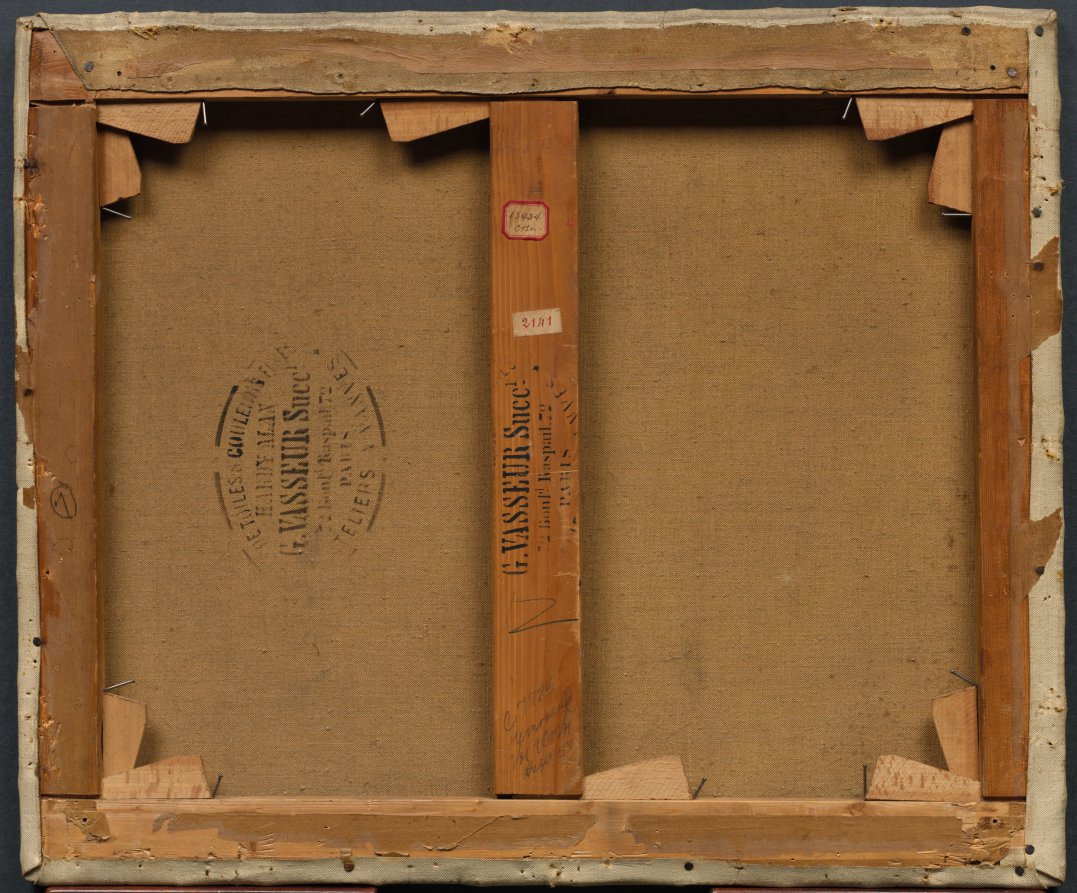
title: Canal in Autumn (Gisors)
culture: France, early 20th century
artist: Henri Le Sidaner (French, 1862–1939)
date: 1913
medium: oil on canvas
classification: Painting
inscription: Distinguishing marks on canvas face: signed with green painting in the lower left: "Le Sidaner"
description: This painting depicts a canal in Gisors, a commune in Normandy, about 40 miles northwest of Paris on the river Epte. Le Sidaner painted this work in a Divisionist technique of applying pure color in large, broken strokes, often separated by areas of white or gray. Unlike the Impressionists, Le Sidaner preferred a restrained palette of delicately nuanced tones that evoke a mood of quiet mystery. His views of old canals, typically portrayed in a crepuscular or nocturnal light, and completely absent of figures, allude to the passage of time and a timeless eternity that exceeds the human life span.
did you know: Le Sidaner often painted from memory rather than directly on site, and his subdued use of color applied in uneven brushstrokes bring a poetic, dreamlike effect to his paintings.